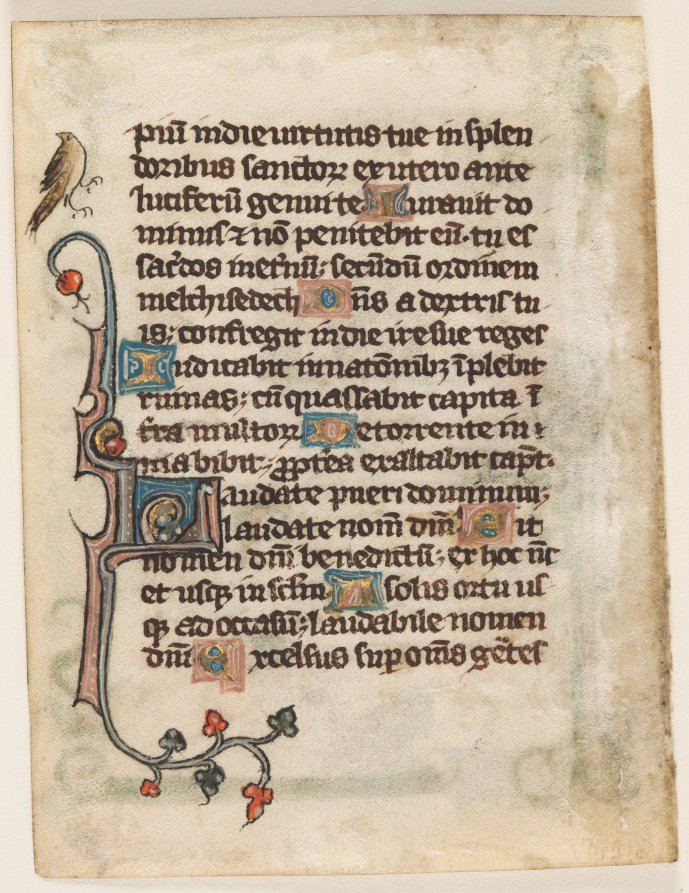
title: Leaf from a Book of Hours: Initial D: Flight into Egypt (2 of 2 Excised Leaves)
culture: Northern France or Flanders, early 14th Century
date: early 1300s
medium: ink, tempera, and gold on vellum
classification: Manuscript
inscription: Deus in adiutorium meum intende. Domine ad adiuvandum me festina. Gloria Patri, et Filio: et Spiritui sancto. Sicut erat in principio A Beata mater. PS. [Psalm 109:]Dixit Dns Dno meo: sede a dextris meis. Donec ponam inimicos tuos scabellum pedum tuorum. Virgam virtutis tuae emittet Dominus ex Sion: dominare in medio inimicorum tuorum. Tecum principium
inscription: ...Excelsus super omnes gentes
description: These initials introduce the text Deus in adiutorium meum intende (God come to my assistance). The borders include playful animals or humans engaged in assorted activities: a dog catching a hare; a lion; a peacock; and a woman winding yarn. The illuminators of books of hours, like the artists of psalters before them, continued to explore the possibilities suggested by open space on the page in order to showcase their ingenuity and delight the reader.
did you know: All books of hours contain the same basic sections and were highly customizable.